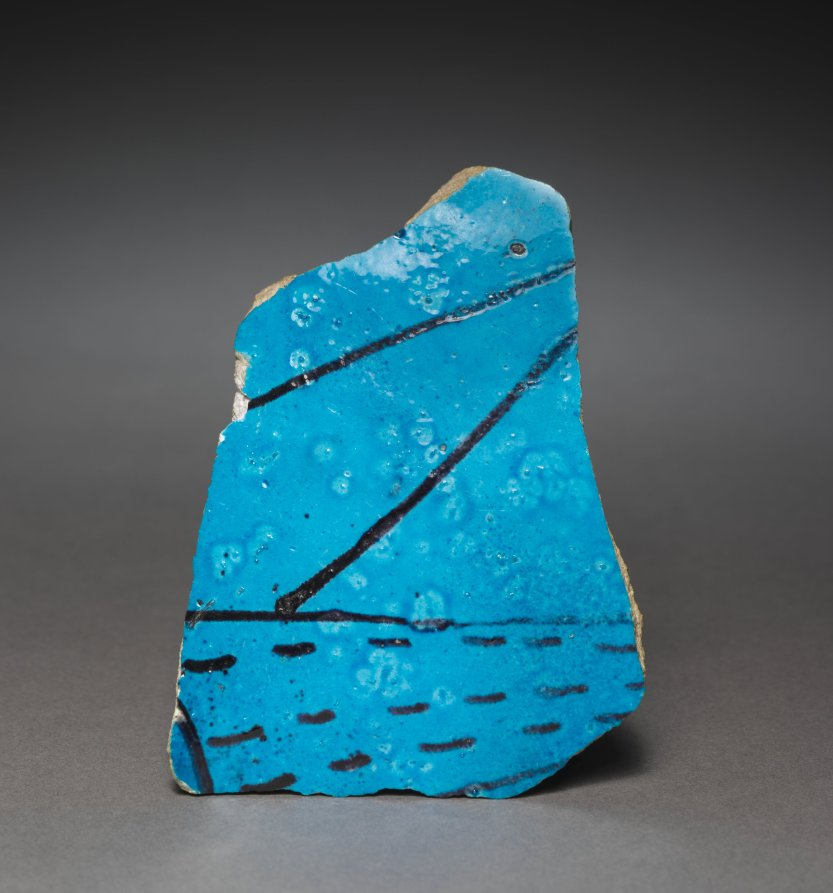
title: Marsh Bowl Fragment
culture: Egypt, New Kingdom (1540–1069 BCE), Dynasty 18, reign of Hatshepsut (c. 1479–1458 BCE) or reign of Tuthmosis III (1479–1425 BCE)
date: 1479–1429 BCE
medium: blue faience with purple decoration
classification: Vessels